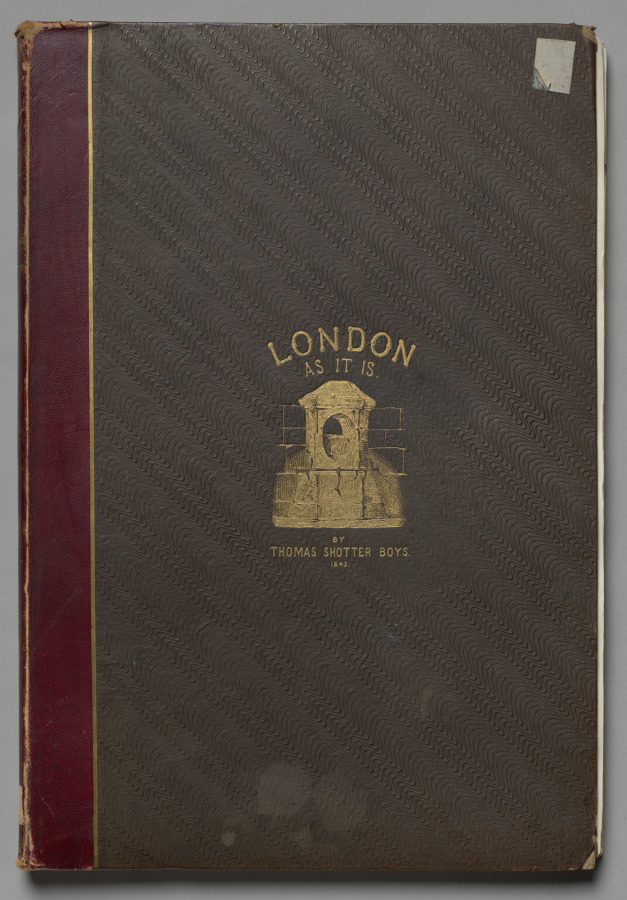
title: London As It Is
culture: England, 19th century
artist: Thomas Shotter Boys (British, 1803–1874)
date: 1842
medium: lithograph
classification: Bound Volume